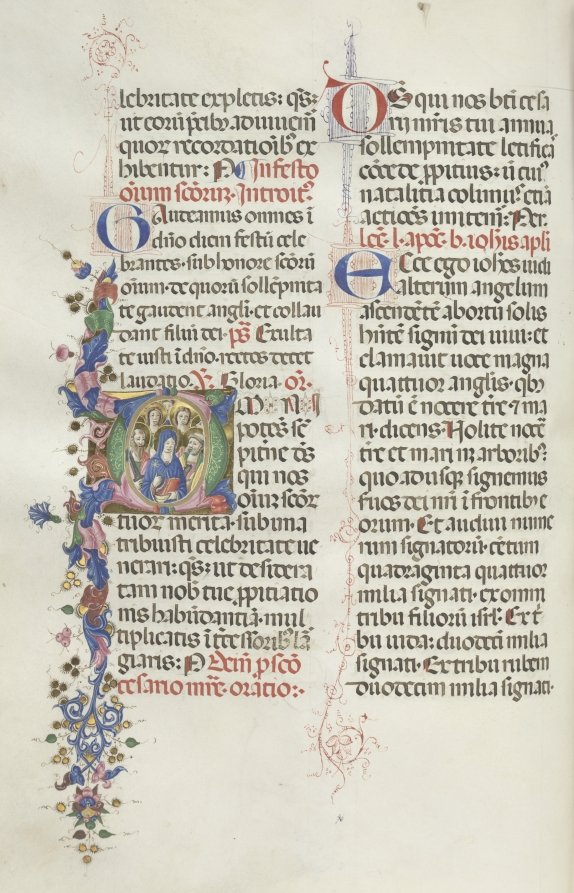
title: Missale: Fol. 322v: The Virgin among the Apostles and Saints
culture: Italy, Perugia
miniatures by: Bartolommeo Caporali (Italian, c. 1420–1503)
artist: assisted by Giapeco Caporali (Italian, d. 1478)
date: 1469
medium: ink, tempera and burnished gold on vellum (400 folios; 3 full page illuminations; 31 historiated initials)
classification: Bound Volume